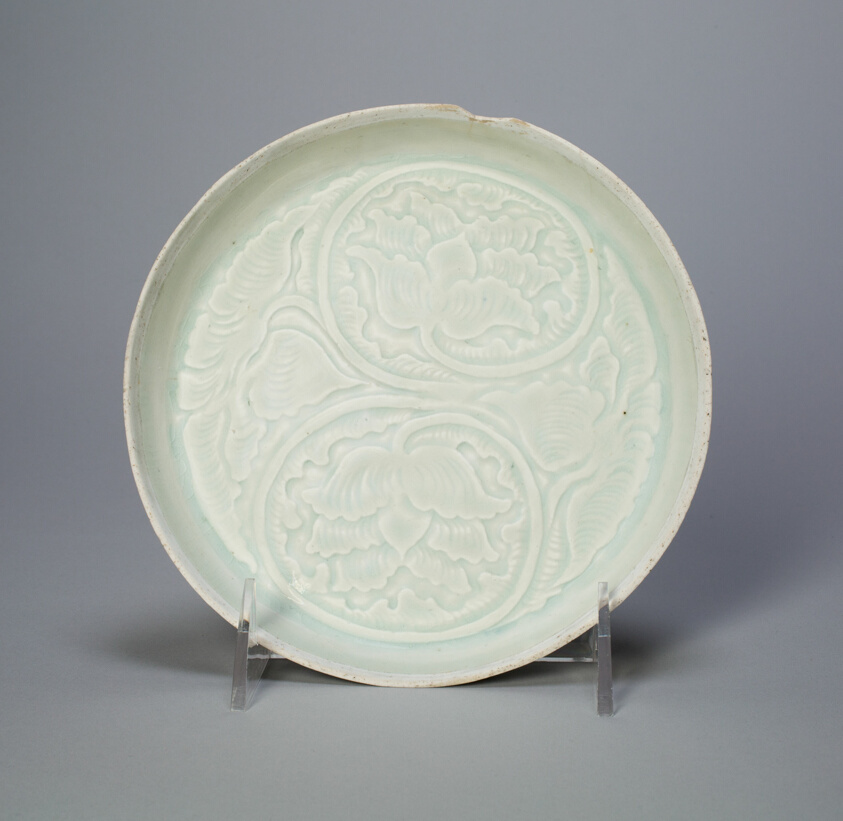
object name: Vessel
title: Dish with Peonies and Leaves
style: Chinese (culture or style)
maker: China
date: Song dynasty (960–1279)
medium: Qingbai ware; stoneware with underglaze carved and incised decoration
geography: China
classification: dish (vessel); asian art; ceramics; vessel